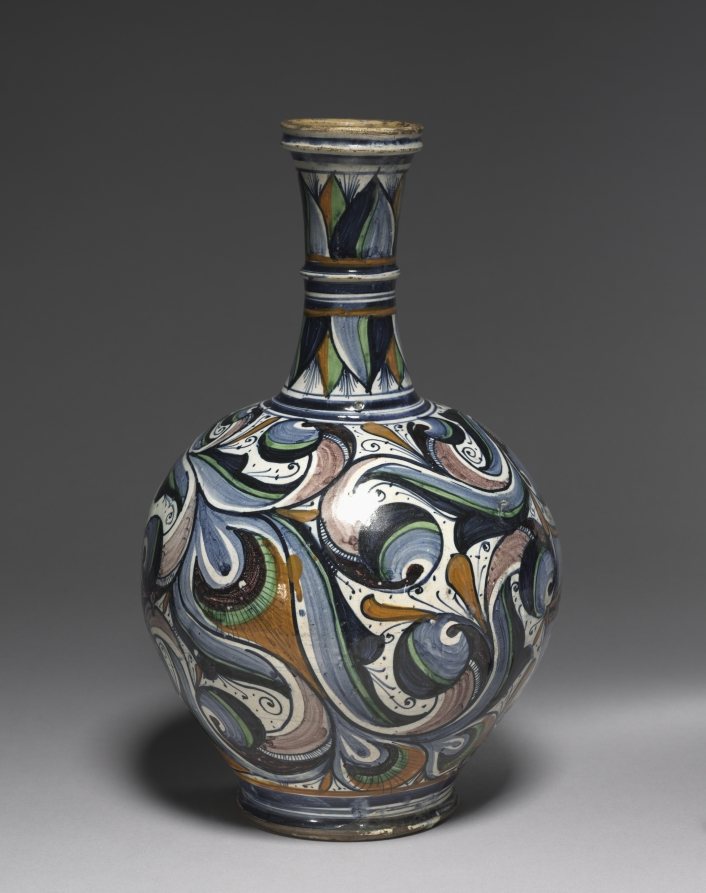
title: Pharmacy Bottle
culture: Italy, Papal States, Faenza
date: c. 1500–1510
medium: tin-glazed earthenware (maiolica)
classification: Ceramic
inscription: written in lower ribbon band: A. CAPILLV.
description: Pharmacy bottles that lined the shelves of Renaissance pharmacies often held medicinal herbs, spices, and ointments. The inscription on this bottle reads CAPILLV, which was a liquid extracted from a fern-like plant commonly referred to as “maiden’s hair water.”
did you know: The peacock feather design lining the bottom of this bottle was especially popular in Faenza, near Bologna, during the Renaissance.